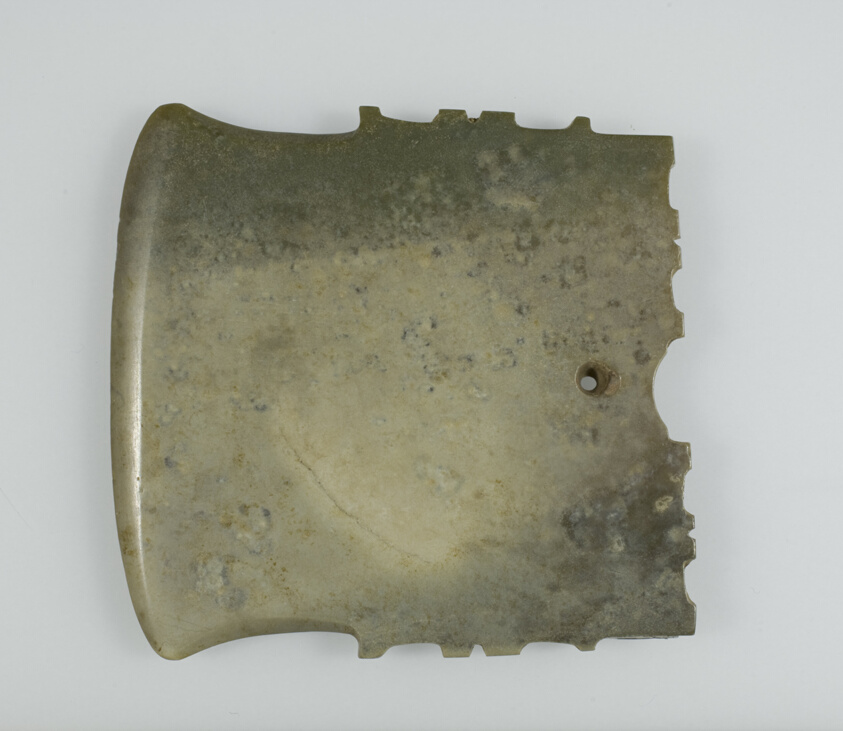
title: Axe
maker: China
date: Shang dynasty (c. 1600–c. 1046 B.C.)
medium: Jade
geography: China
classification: jade; asian art